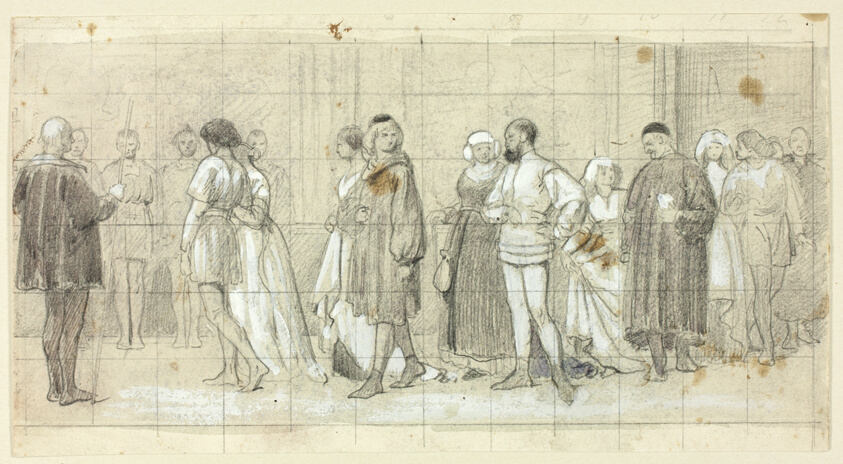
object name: Drawing and Watercolor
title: Figures in Procession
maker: Henry Stacy Marks (English, 1829-1898)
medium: Black chalk, with brush and gray wash and watercolor, heightened with white gouache, squared in graphite, on ivory wove paper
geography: England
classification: chalk; drawings (visual works); prints and drawing